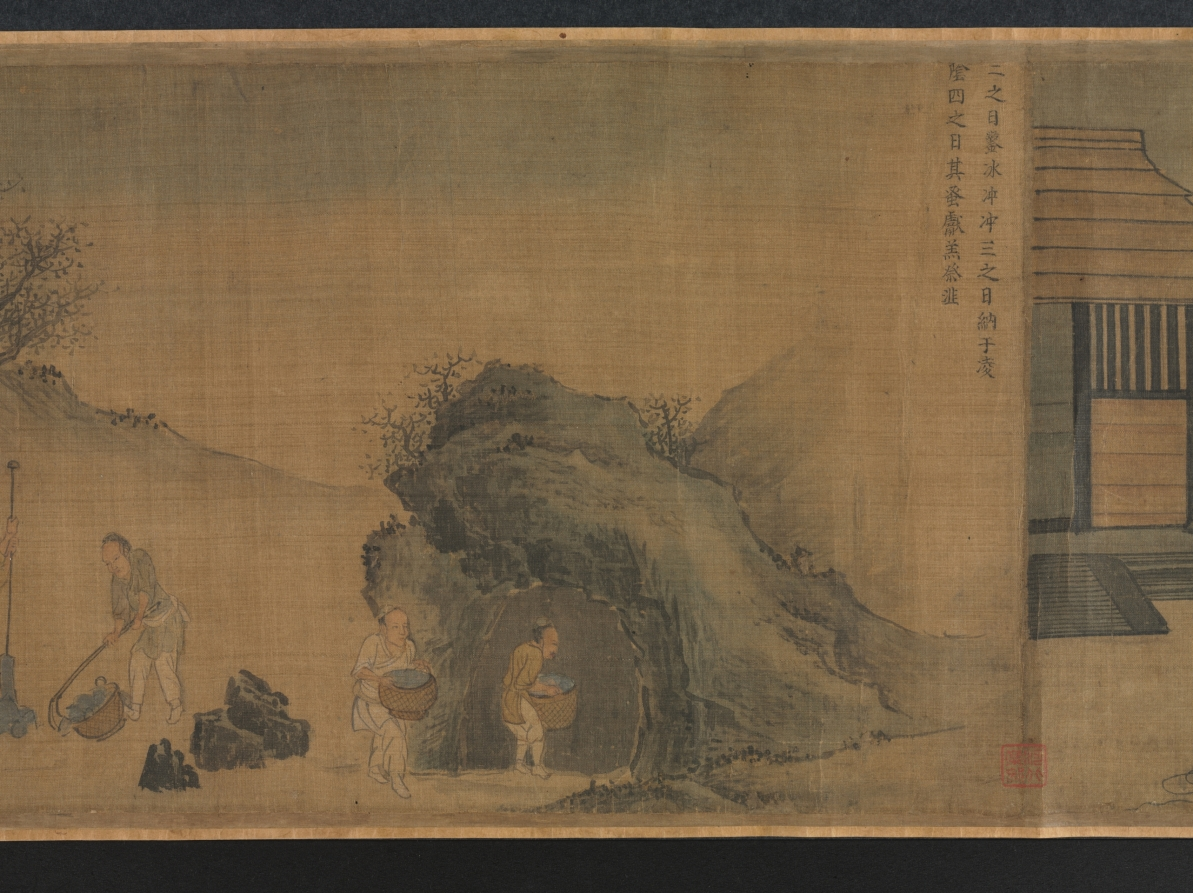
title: "Seventh Month" from the Odes of Bin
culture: China, Southern Song dynasty (1127-1279)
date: 1200s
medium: Handscroll; ink and color on silk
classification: Painting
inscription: Colophons: 1. [on the frontispiece] by the Qianlong emperor (dated 1741). 2. by Lu Wan (dated Zhengde dingchou, 1517). 2. by the Jiaqing emperor (dated 1807).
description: According to Confucian thought, the ruler looks after the well-being of his people which involves agricultural activities. Seventh Month from the ancient Odes of Bin in the Shijing (Book of Poetry) describes occupations throughout the year, including plowing, harvesting, hunting, making clothes, and observing rituals. The earliest illustrations of these Odes accompanied by text were commissioned by Southern Song emperor Gaozong (reigned 1127–1162). As the lower Yangzi delta had become the new seat of government, Gaozong had sets of these illustrations produced by court artists to revive the dynasty and convince the Confucian officialelite of his legitimacy to rule.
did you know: The Odes of Bin appears in the classic Shijing (Book of Poetry), an anthology of more than 300 poems, folk songs, and ceremonial hymns that were originally chanted to music.